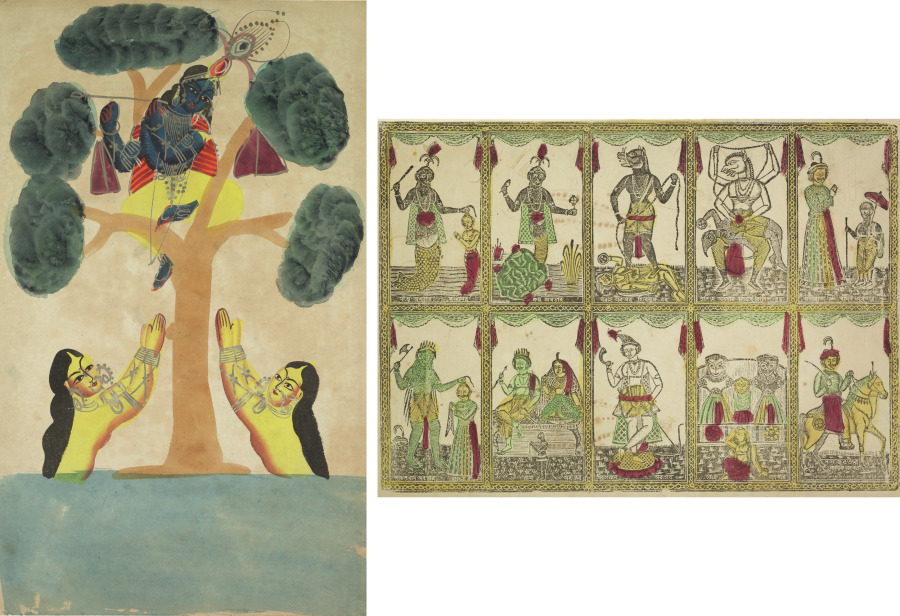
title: Leaf from a Kalighat album: Krishna Steals the Clothes of the Cowgirls (Gopis) (recto); Das Avataras, Ten Incarnations of Vishnu (verso)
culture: Eastern India, Bengal, Kolkata, Kalighat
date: c. 1890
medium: Gum tempera, graphite, ink, and tin on paper; Woodcut, hand colored with gum tempera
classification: Painting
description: In the image on the recto taken from both popular accounts and the Bhagavata Purana, Krishna has stolen the clothes of cowgirls (gopis) who are bathing in the Yamuna River, a tributary of the Ganges River. He refuses to return their clothes, the purple saris seen hanging high in the tree, until they come out and bow to him with folded palms. Krishna, a cowherder, is holding a flute, which he uses to lure them away.